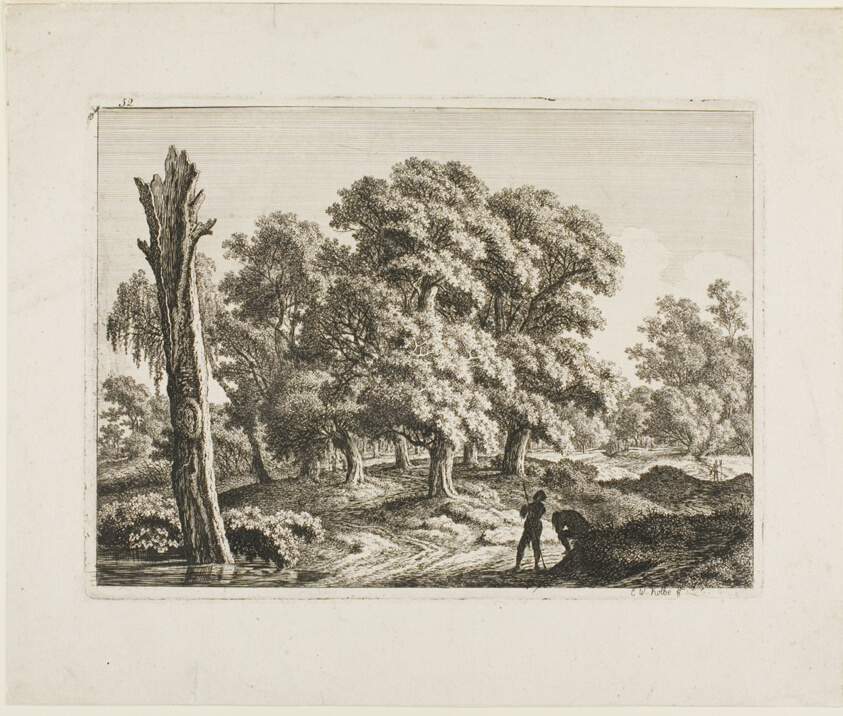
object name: Print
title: Landscape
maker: Carl Wilhelm Kolbe, the elder (German, 1759-1835)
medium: Etching on paper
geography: Germany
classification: etching; print; prints and drawing